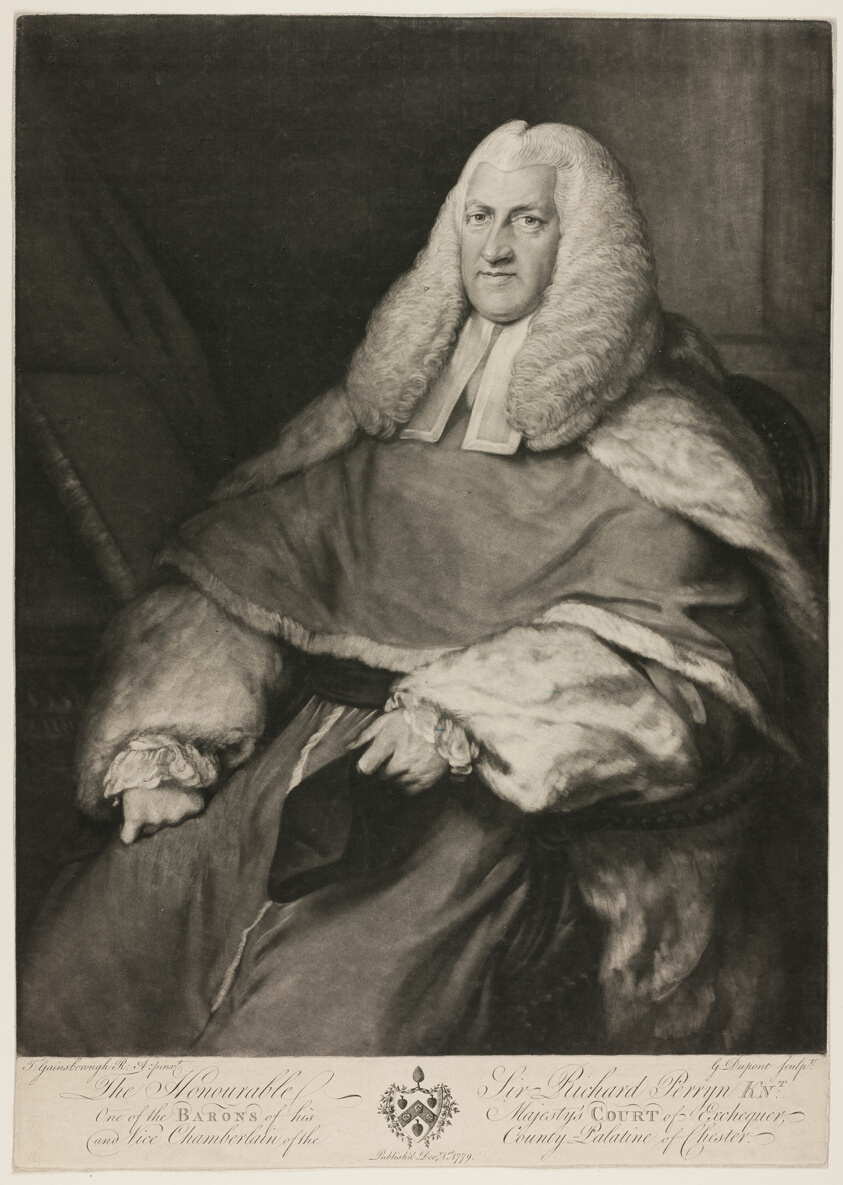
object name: Print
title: Sir Richard Perryn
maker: Gainsborough Dupont (English, c. 1754-1797); after Thomas Gainsborough (English, 1727-1788)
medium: Mezzotint on paper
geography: England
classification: mezzotint; print; prints and drawing